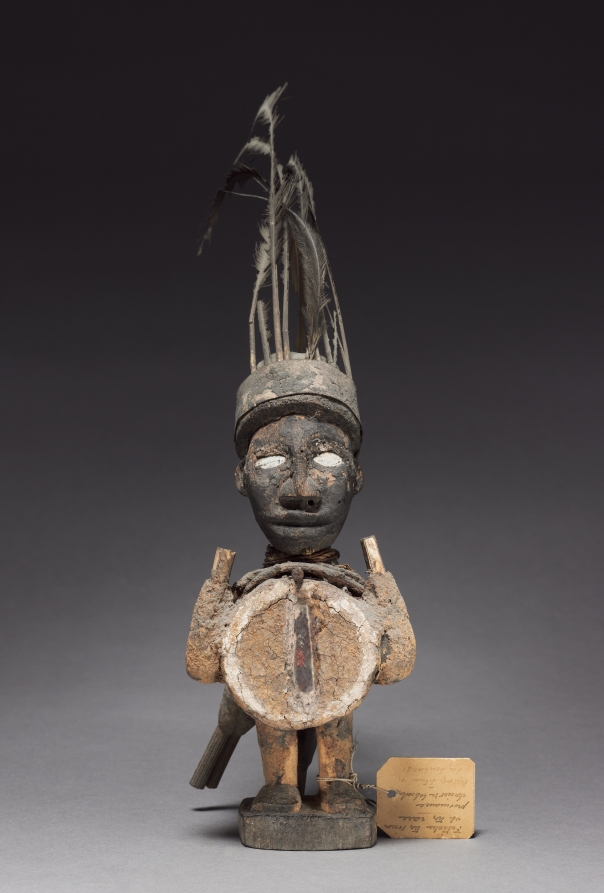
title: Power figure (nkisi)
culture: Africa, Central Africa, Republic of the Congo, Kongo-style maker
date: late 1800s-early 1900s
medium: Wood, metalized glass, organic materials (including resin), feathers, plant fibers, iron, and copper alloy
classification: Sculpture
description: One of seven minkisi figures previously in the René and Odette Delenne collection, this object contained medicines in which an ancestral spirit was believed to reside. This figure is one of the two tallest in the collection. Feathers of a bird of prey adorn its head, with two small guns pointing upward and a third hanging down. It had belonged to “the sorcerer of Louboulou.”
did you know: This is one of two tallest in the collection of spiritual figurines loaded with gunpowder to shoot at witches: nduda, or “night guns.”